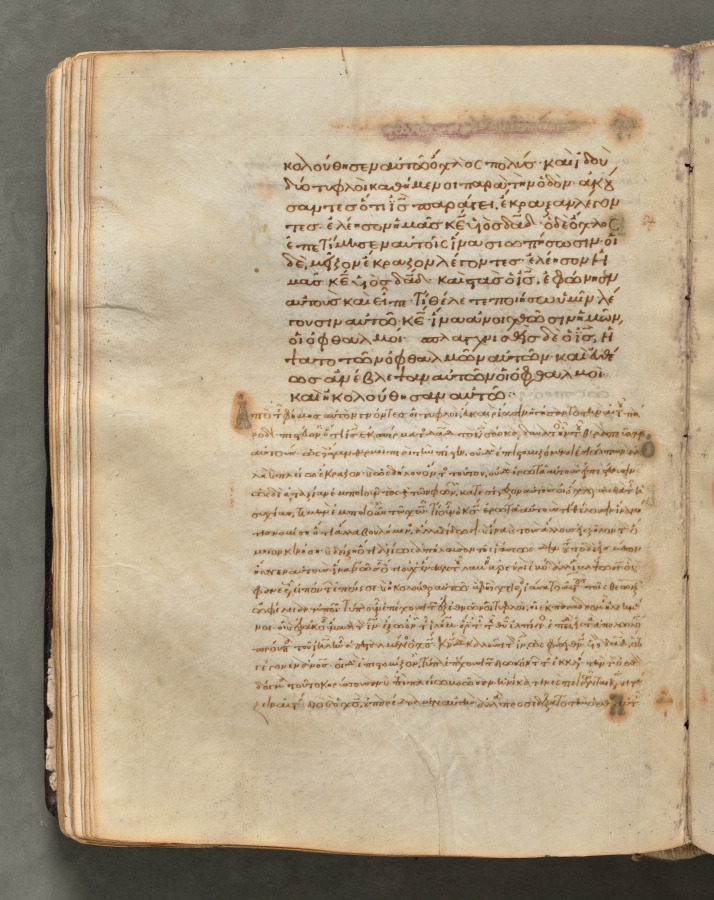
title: Text, folio 90 (verso), from a Gospel Book with Commentaries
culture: Byzantium, Constantinople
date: c. 1000–1100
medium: ink, tempera, and gold on vellum; leather binding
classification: Bound Volume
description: Each of the four gospels in this book opens on a page with brilliantly illuminated borders depicting the author of the text as well as birds-principally peacocks, symbols of the immortality of the soul-and fountains, representing the fountain of life and the salvation of the soul. This volume consists of 428 leaves with texts in Greek. Its level of sophistication suggests that it was probably written and decorated in a monastery in Constantinople.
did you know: Gospel Books were carried in procession through Byzantine churches.